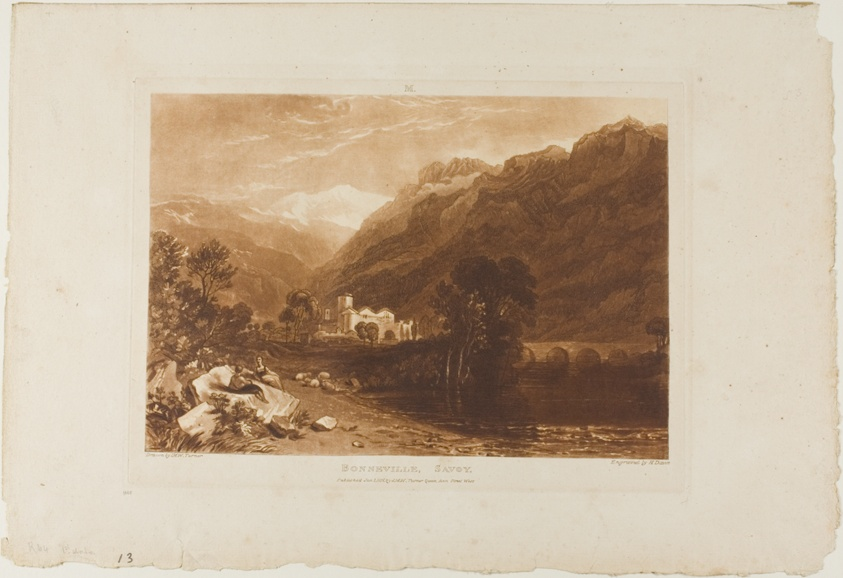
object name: Print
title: Bonneville, plate 64 from Liber Studiorum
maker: Joseph Mallord William Turner (English, 1775-1851); Engraved by H. Dawe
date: published January 1, 1816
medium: Etching and engraving in brown on ivory paper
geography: England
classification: mezzotint; print; prints and drawing